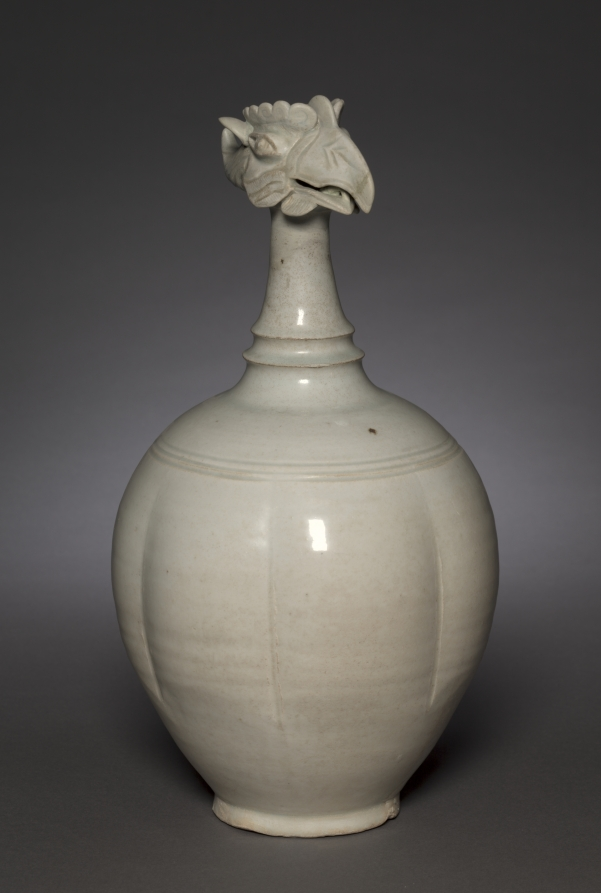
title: Phoenix-Headed Ewer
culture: China, possibly Guangdong Province, Xicun, Northern Song dynasty (960–1127)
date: 1000s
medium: porcelain with pale greenish-white glaze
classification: Ceramic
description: Phoenix-headed ewers of this type have been unearthed at Xicun in Guangdong province. Wares with a thick and coarse body were fired in local Xicun kilns, but those with a thin and refined body—such as this piece—were likely produced at Jingdezhen in Jiangxi province.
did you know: The phoenix's beak forms a spout for pouring.